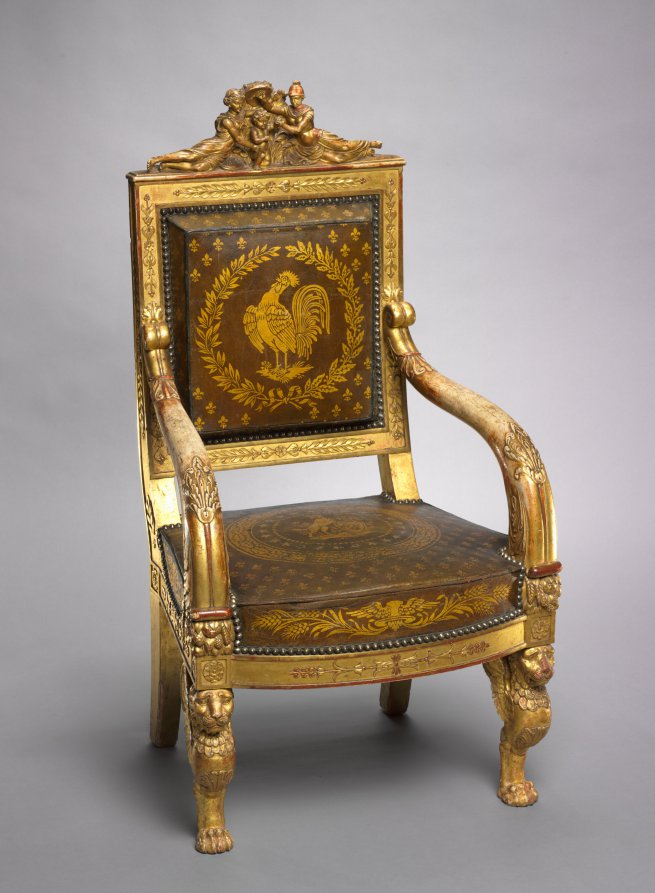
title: Child's Throne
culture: France, Paris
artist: Pierre-Marie Balny le Jeune (French, 1832)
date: 1822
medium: carved and gilded wood, leather upholstery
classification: Furniture and woodwork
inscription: inscribed with stencils inside back rail: BLONDEL TAPISSIER/RUE ST. ANTOINE N 72 1822 inscribed in ink lower edge back rail: 12 JANVIER 18[22?]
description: This chair was made for the young, presumed successor to the French throne who ruled briefly as Henri V in 1830, the last of the direct Bourbon line. He is depicted at the center of the top rail protected by female figures representing France and Minerva, the Roman goddess of wisdom. Fleurs-de-lis and the Gallic rooster, symbols of French royalty and the French people, decorate the upholstery.